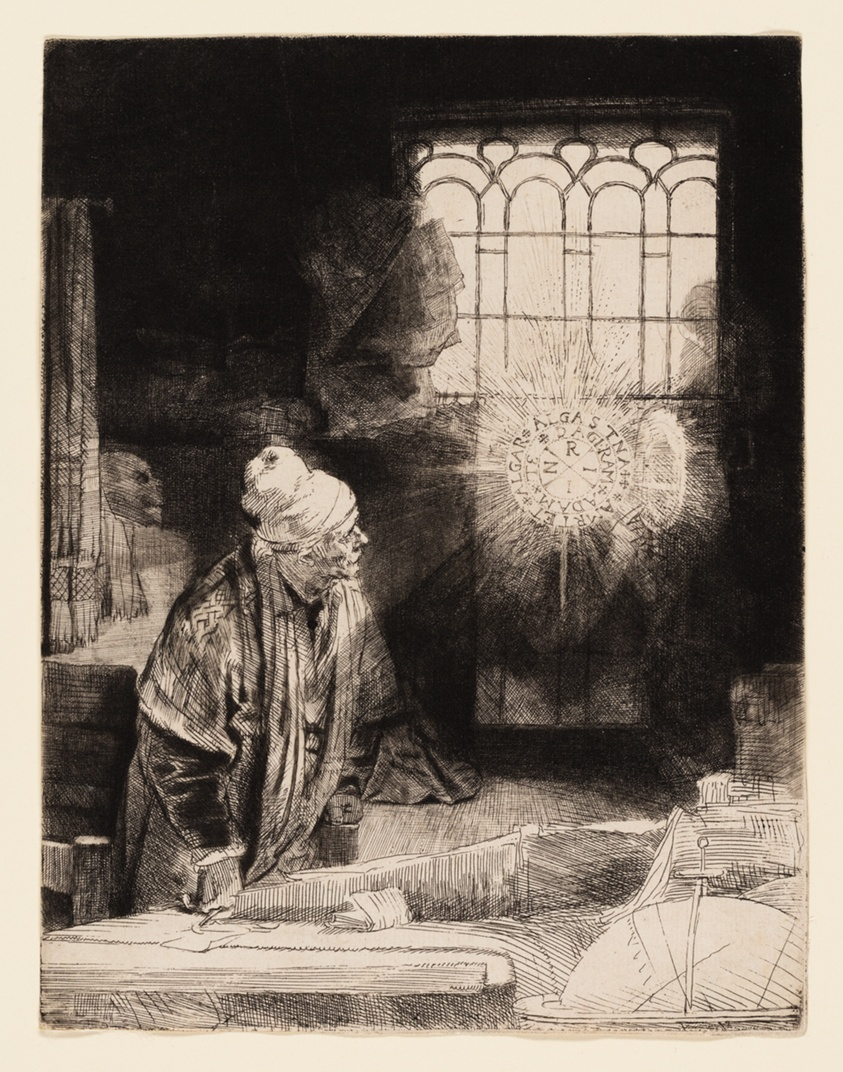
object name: Print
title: A Scholar in His Study (Faust)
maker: Rembrandt van Rijn (Dutch, 1606-1669)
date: c. 1652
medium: Etching, drypoint and engraving on white laid paper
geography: Holland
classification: etching; print; prints and drawing; paper; drypoint; engraving